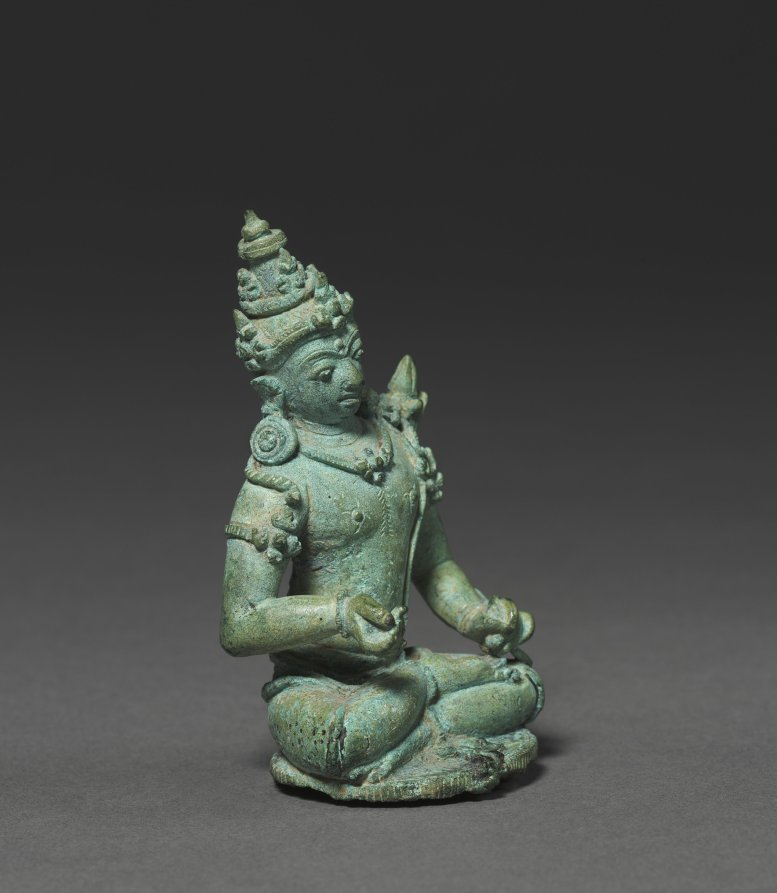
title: Bodhisattva Padmapani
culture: Java, predating Nganjuk style, 10th century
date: 900s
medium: bronze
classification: Sculpture